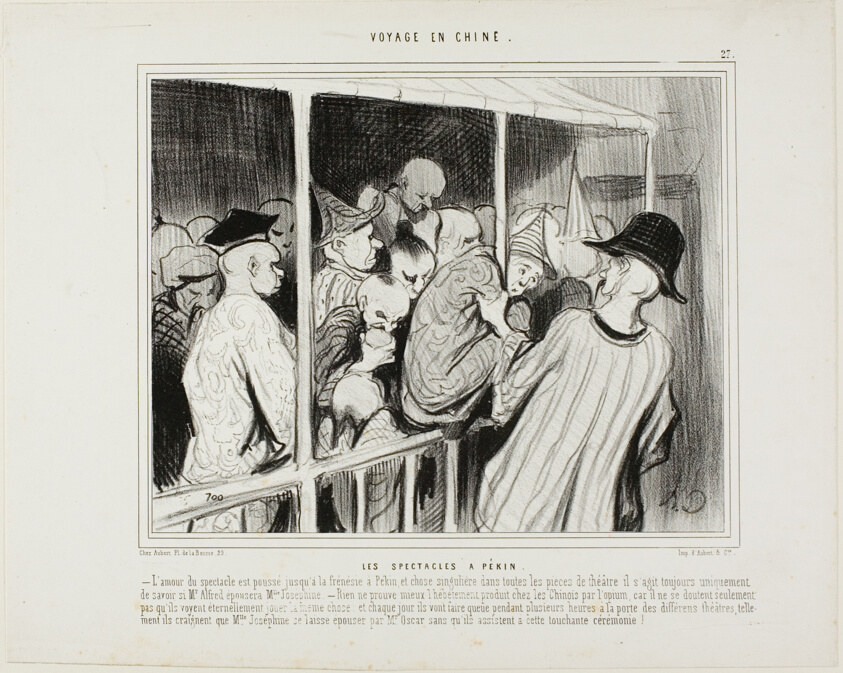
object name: Print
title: Theater Plays in Beijing. The love for the theater in Beijing is reaching almost absurd dimensions, and strangely enough in all the plays it is about whether Mr. Alfred will marry Miss Josephine. There is no better proof for the stupidity of the Chinese people caused by opium, because they don't even realise that they see the same play every night and they stand in line in front of different theaters every day, worried that Miss Josephine marries Mr. Oscar without them attending the touching wedding ceremony, plate 27 from Voyage En Chine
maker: Honoré Victorin Daumier; French, 1808-1879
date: 1845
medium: Lithograph in black on white wove paper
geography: France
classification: lithograph; print; prints and drawing